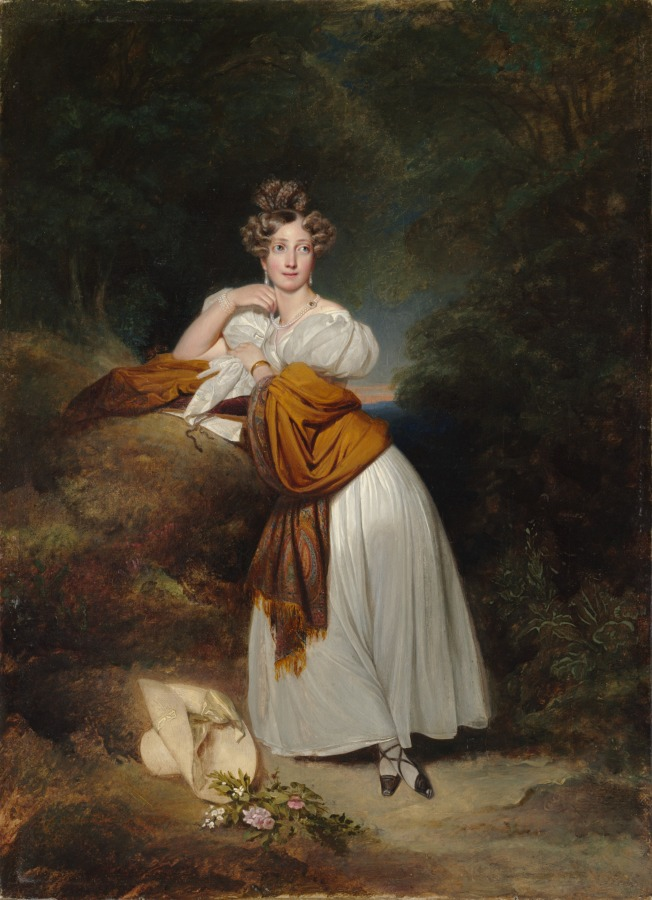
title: Sophie Guillemette, Grand Duchess of Baden (1801-1865)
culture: Germany, 19th century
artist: Franz Xaver Winterhalter (German, 1805–1873)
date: 1831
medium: oil on fabric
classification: Painting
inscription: Signed lower left: Fr. Winterhalter f 1831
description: Sophie Guillemette (1801-1865), daughter of Gustavus IV Adolphus of Sweden, was the wife of Grand Duke Leopold of Baden. Winterhalter was her drawing instructor and made several portraits of both the duke and the duchess before leaving for London to become the most celebrated portrait painter of his time.